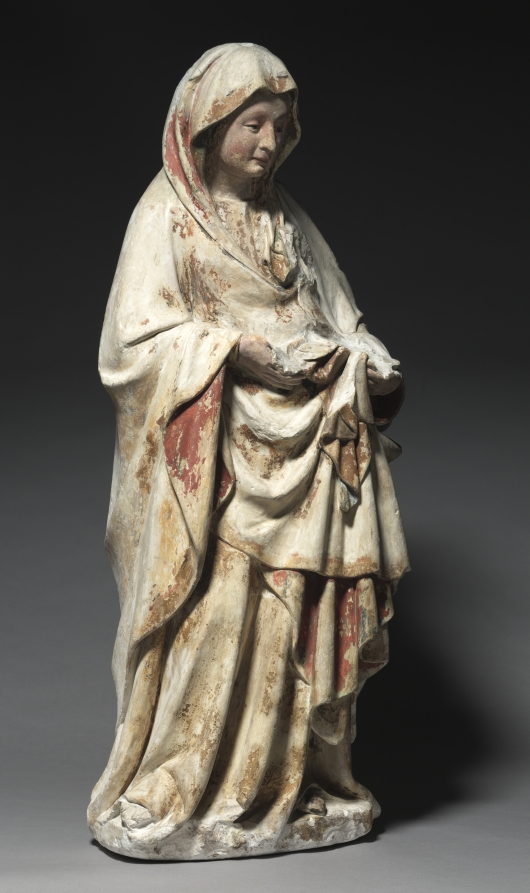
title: Standing Virgin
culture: Netherlands, active Dijon, 15th century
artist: follower of Claus de Werve (Netherlandish, 1380–1439)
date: c. 1440–1450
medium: painted and gilded limestone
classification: Sculpture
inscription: inscriptions on reverse.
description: This standing Virgin now lacks the child she once cradled in her left arm. The sculpture may have been damaged in the French Revolution by falling onto its face. It was carved from soft white limestone of a type known to be quarried at Asnières-lès-Dijon, near Champmol. The figure recalls many of the hallmarks of the style of Claus de Werve, a Netherlandish artist active at the court of Burgundy. The Virgin has a sweet, round face that is also smooth and fleshy, her eyelids droop pensively and she is engulfed in rich voluminous draperies that cascade in deep folds. This sculpture should be seen as a charming reflection of de Werve’s many Virgin and Child groups. It was probably carved by a follower closely acquainted with his style.